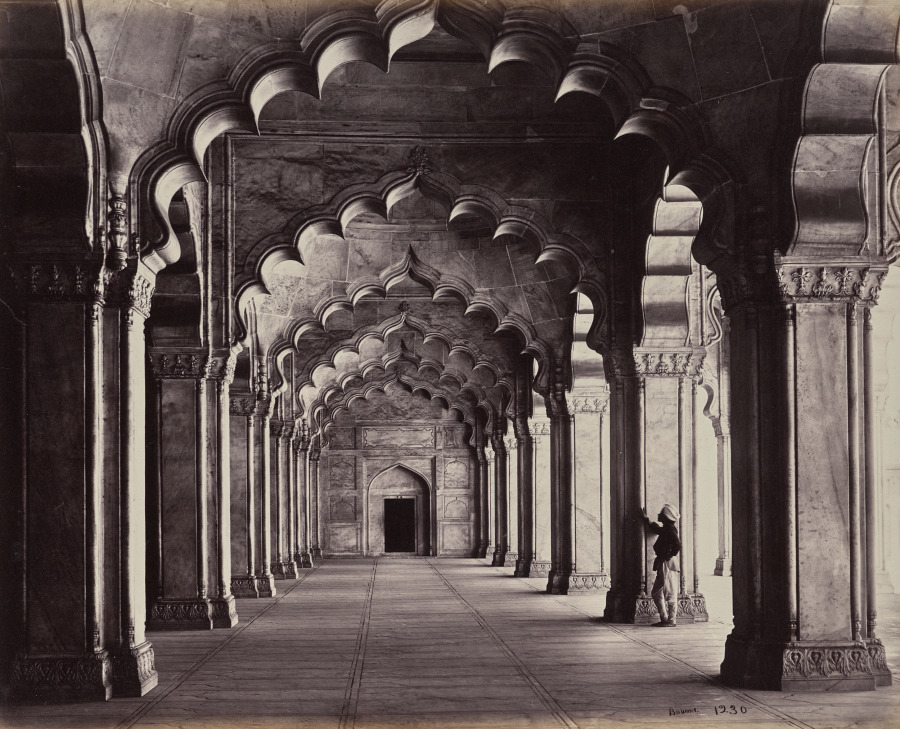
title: Agra. The Motee Hasjid in Pearl Mosque. View of the Entire Aisle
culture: England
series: Photographs of Northern India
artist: Samuel Bourne (British, 1834–1912)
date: 1863–70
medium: albumen print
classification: Photograph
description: The 50 images in this album, all taken in the 1860s, move from the hill towns of the Himalayas down to cities including Lahore (now in Pakistan), Delhi, Lucknow, Agra, Benares (now Varansi), and Calcutta (now Kolkata). Architectural studies of major monuments offer valuable historical records of what sites such as the Taj Mahal and the imperial mosque of the Mughal emperors in Delhi looked like before twentieth-century restorations.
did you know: Samuel Bourne, the author of most the images in this album, was a banker in England before he moved to India to become a professional photographer.